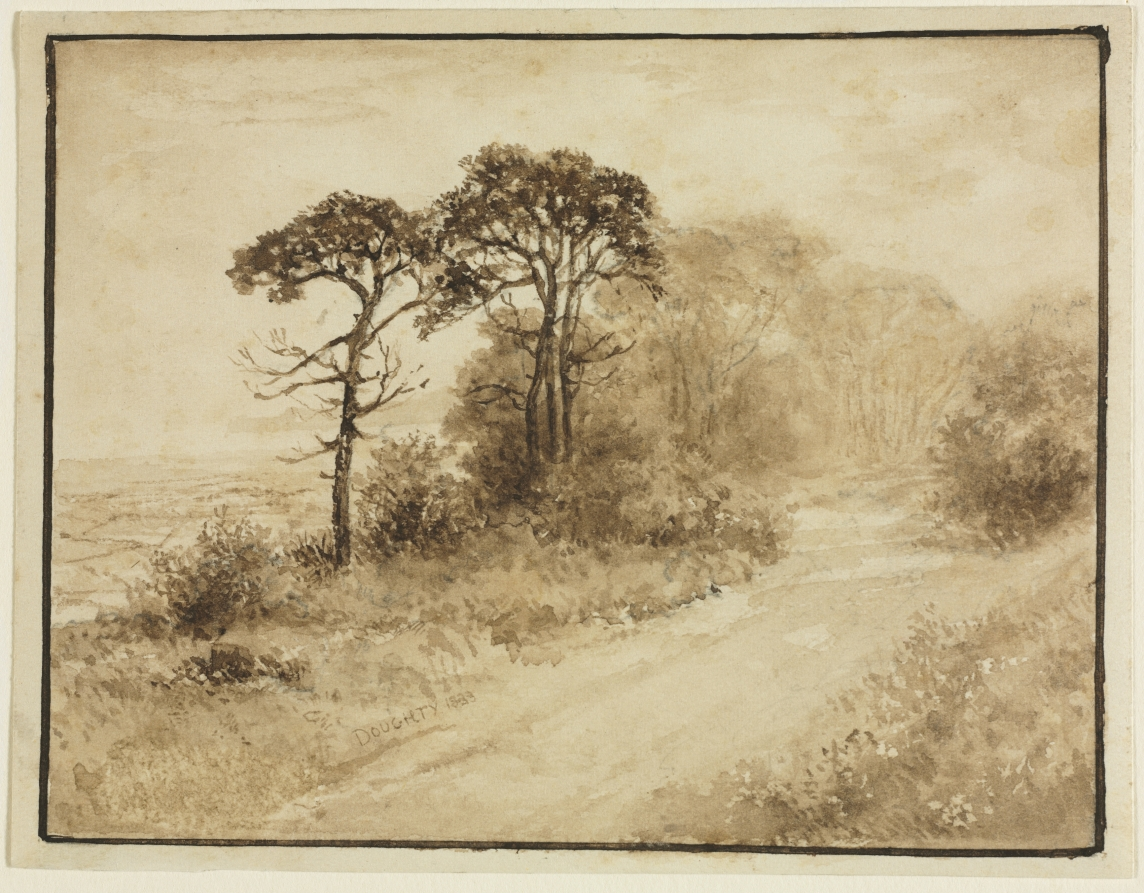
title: Landscape with Winding Road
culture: America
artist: Thomas Doughty (American, 1793–1856)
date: 1833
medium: brush and brown wash over graphite; framing lines in brown ink (scored)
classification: Drawing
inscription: signed, lower right, in brown ink: DOUGHTY 1833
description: Doughty belonged to the generation of American landscape painters who preceded the Hudson River school. Early compositions such as Landscape with Winding Road display his mastery of atmospheric effects and his familiarity with the contemporary popular aesthetic of the picturesque. Doughty became best known for his romantic interpretations of sublime American scenery—poetic evocations rather than literal portraits of specific locales.